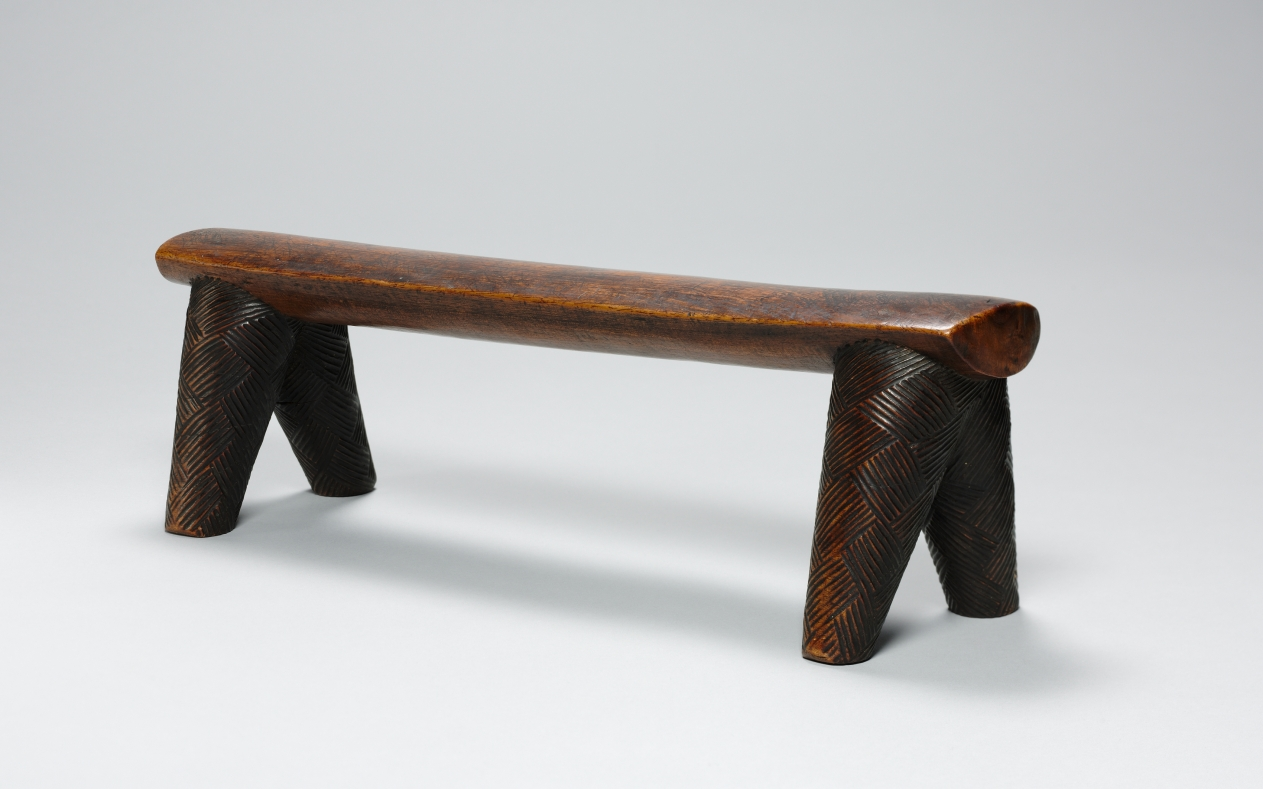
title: Headrest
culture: Africa, Southern Africa, South Africa, Zulu-style carver; Africa, Southern Africa, South Africa, Kingdom of Eswatini, Swazi-style carver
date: 1800s–1900s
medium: Wood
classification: Furniture and woodwork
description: The shape of this four-legged headrest alludes to cattle, whether bull, ox, or cow. This reference services from the fact that these animals are a source of wealth but also act as mediators between the living and the dead. In earlier days, both headrests and cattle were used in dowry transactions.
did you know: Headrests served to protect the elaborate coiffures highly fashionable until the early to mid-20th century and also enhanced contact with the ancestral realm through dreams.